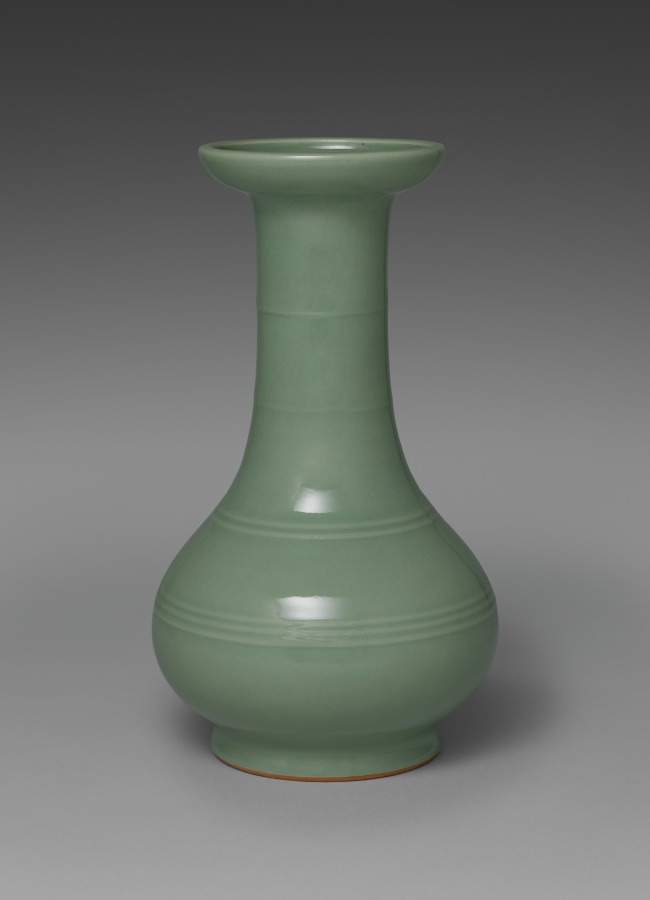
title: Vase with Bamboo Joints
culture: Japan, Taishō period (1912–26)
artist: Seifū Yohei IV (Japanese, 1872–1951)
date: 1914–46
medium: Porcelain with green glaze and molded design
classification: Ceramic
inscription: 清風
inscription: 清風造【印】清風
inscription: 成山清風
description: Yohei IV’s Vase with Bamboo Joints has a shape often seen in pairs of bronze flower vases placed to either side of Buddhist altars before sculptural icons. While the term hisoku (Chinese mise 秘色), or “mysterious color” glazing, indicates a more specific green color than seiji 青磁, a more general word for green-glazed porcelain, there is still some range in the actual color of the glaze.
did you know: Many ceramics created by the Seifū Studio refer to and emulate Chinese ceramics in form and glazing.